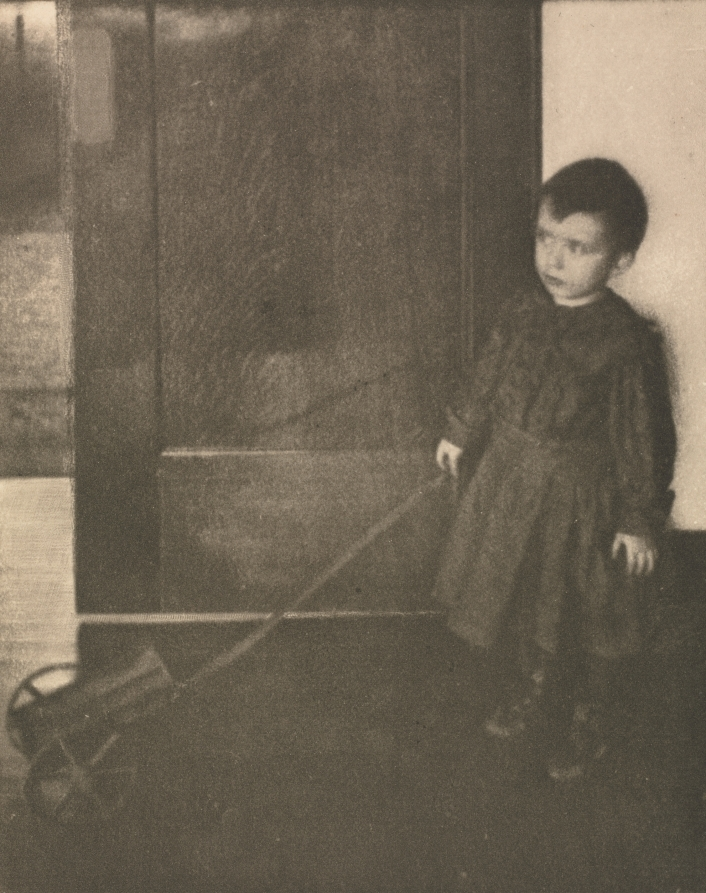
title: Camera Work: Boy with Wagon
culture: America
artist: Clarence H. White (American, 1871–1925)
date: 1908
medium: photogravure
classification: Bound Volume